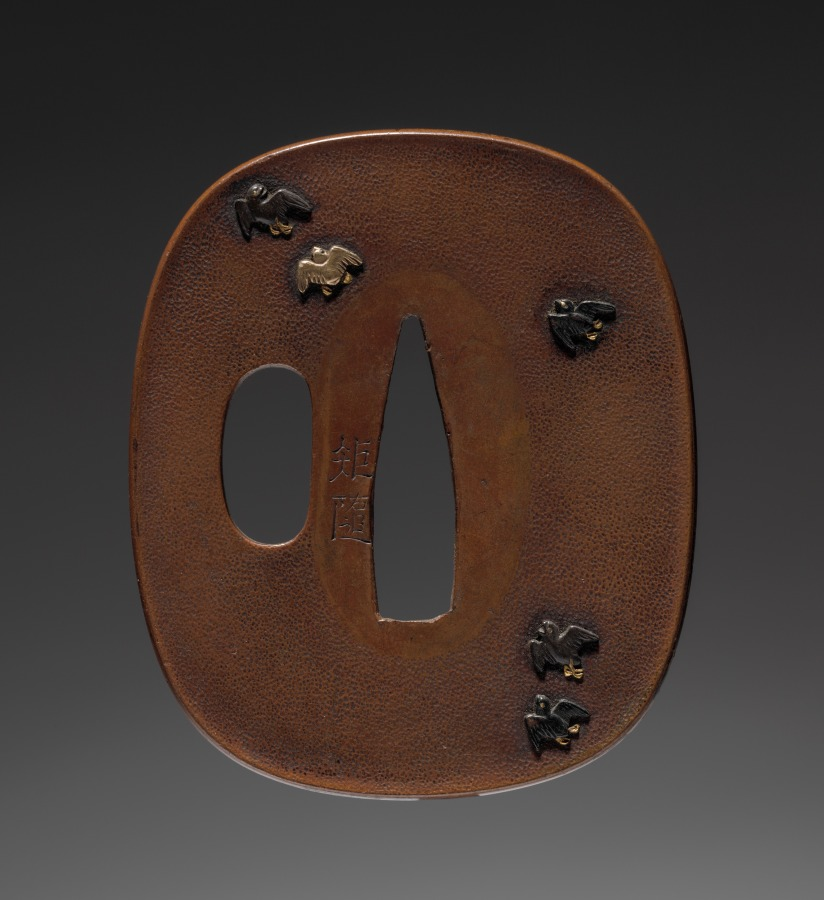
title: Sword Guard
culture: Japan, Edo period (1615–1868)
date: late 1700s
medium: bronze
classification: Arms and Armor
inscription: Signature: Noriyuke